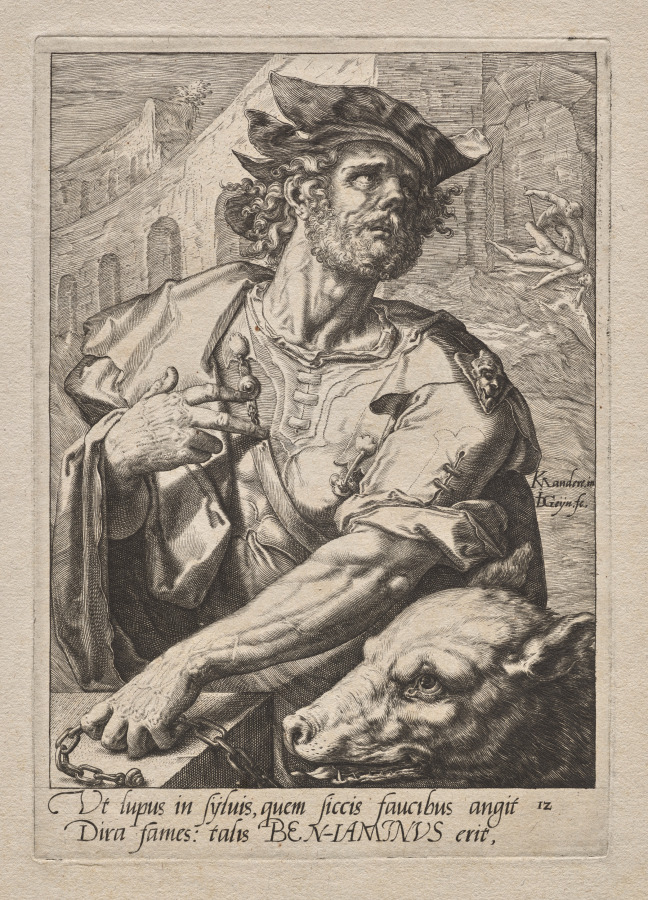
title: Plate 12: Benjamin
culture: Netherlands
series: The Twelve Sons of Jacob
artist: Jacob de Gheyn II (Netherlandish, 1565–1629)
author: after Karel I van Mander (Netherlandish, 1548–1606)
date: c. 1589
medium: engraving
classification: Print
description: In this print, the biblical figure Benjamin holds a wolf by a chain while an act of violence takes place behind him, denoting his ferocity in battle. This is one of a series of prints depicting the twelve sons of Jacob, each with an attribute and costume that denotes his character. According to the Old Testament, Jacob blessed each of his twelve sons, prophesizing the destiny of their tribe, and assigning them a parcel of land in Canaan. The print series was made in the Netherlands in the late 16th century, a time of political struggle when Old Testament heroes were popular exemplars of fortitude and patience.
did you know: The appearance of a wolf in this print illustrates the Old Testament prophesy of Jacob, that “Benjamin is a ravenous wolf; In the morning he devours the prey, And in the evening he divides the spoil (Genesis 49:28).